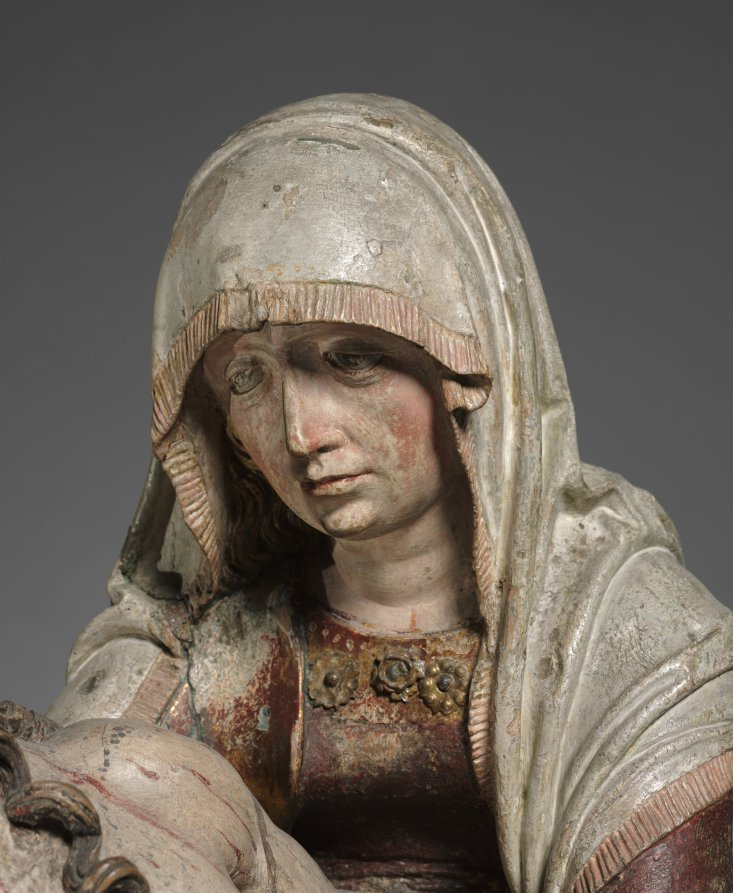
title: Vesperbild (Pietà)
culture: Germany, Upper Bavaria, 16th century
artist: Master of Rabenden (German)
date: c. 1515–20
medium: lindenwood, polychromed and gilded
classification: Sculpture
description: Depicting the Virgin cradling Christ’s dead body, works like this one were known in German as vesperbilds, owing to their incorporation into the liturgy of the evening prayer (vespers) on Good Friday. The word pietà—from the Latin pietas, meaning "piety" or "compassion"—was also used to describe such works. Like other devotional image types that emerged in southern Germany in the later medieval period, vesperbilds encouraged viewers to contemplate Christ’s suffering and empathize with the Virgin’s sorrows more directly and emotively than ever before. This anonymous German artist is named after one of his most important works, the high altar of the church of Rabenden in the Chiemgau, the foothills of the Alps. The sculpture was likely placed in a secondary chapel in a Bavarian church.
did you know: This sculpture sensitively depicts the Virgin cradling the body of Christ. This devotional image was likely placed near the altar in a German chapel. Imagine standing in a small, quiet chapel looking up at these lifelike figures with flickering candles casting dappled light onto their surface.